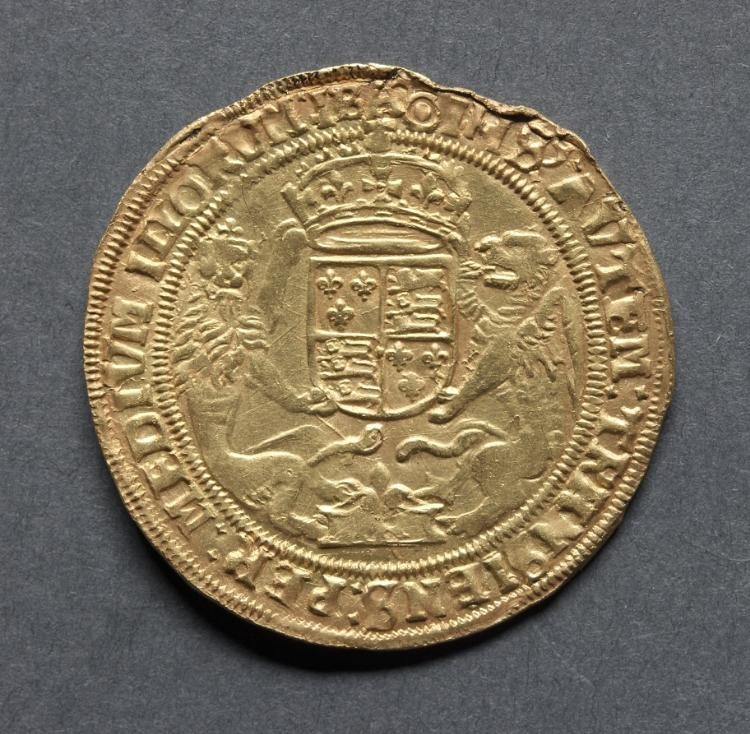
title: Half Sovereign: Henry VIII (obverse);Crowned Arms (reverse)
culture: England, Henry VIII, 1509-1547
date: 1544–1547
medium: gold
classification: Coins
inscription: IHC. AVTEM PER MEDIVM ILLO RVM IBAT.